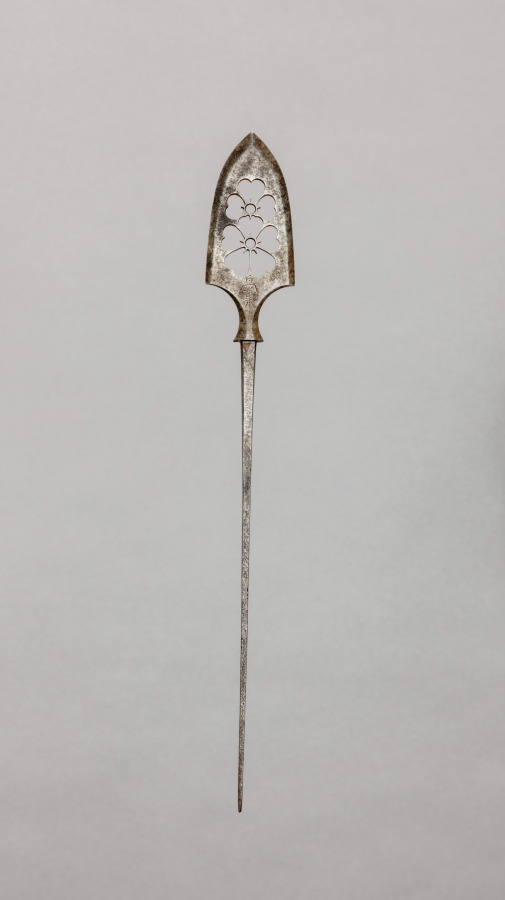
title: Arrow Point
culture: Japan, Edo period (1615–1868)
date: 1700s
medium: steel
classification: Arms and Armor